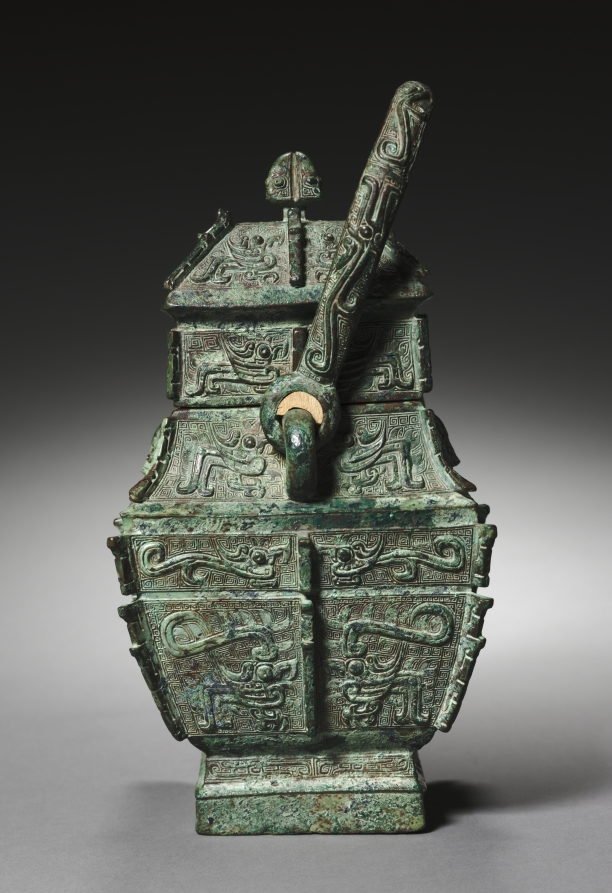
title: Square Wine Container (Fangyou)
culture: China, Henan province, probably Anyang, Shang dynasty (c. 1600–c. 1046 BCE), Anyang phase (c. 1250–1046 BCE)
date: c. 1250–1046 BCE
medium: bronze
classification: Metalwork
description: From the finely proportioned body to the elaborate decoration cast with great precision, this ritual wine vessel displays the artistic refinement and technical virtuosity that marked the full blossoming of late Shang bronze art. The dramatic contrast of the crested birds (kuifeng) against the dense background of spiral patterns (leiwen) gives the vessel a new force, clarity, and intense vitality. The distinctive square body also places it as a rare and important type among the more usual round or ovoid types.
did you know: The bird motif decoration of this bronze is uncommon; more often these bronzes are decorated with a combination of birds and dragons.